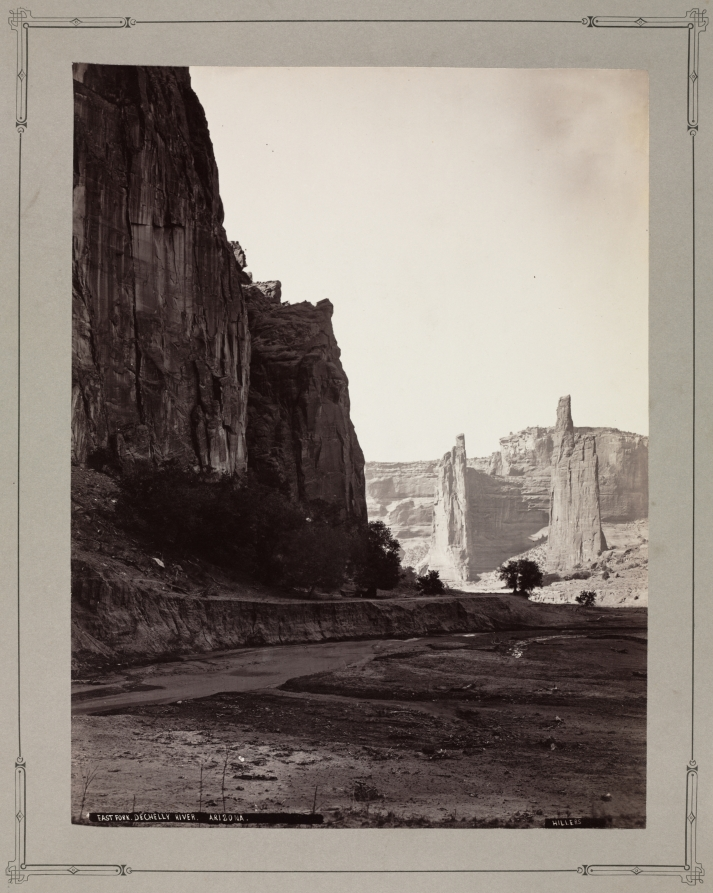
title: East Fork, de Chelly River, Arizona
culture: America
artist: John K. Hillers (American, 1843–1925)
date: 1879–1881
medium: albumen print from wet collodion negative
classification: Photograph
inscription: Imprinted on lower edge of recto: "EAST FORK DECHELLY RIVER.ARIZONA./HILLERS"